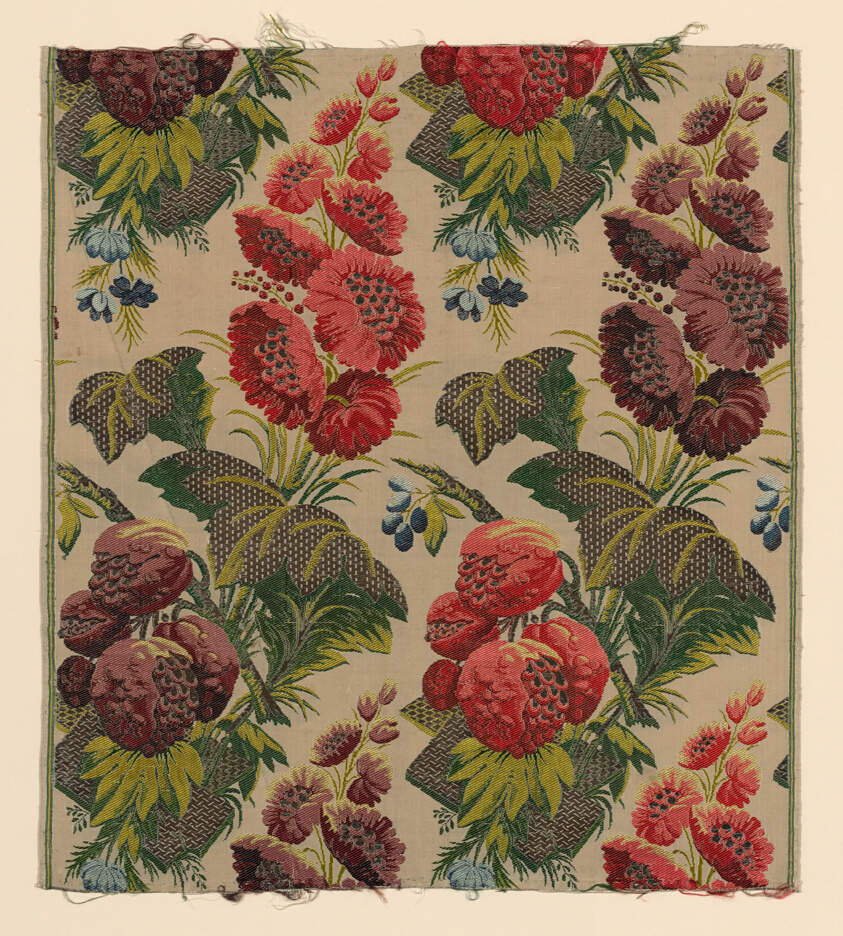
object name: Textile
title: Panel (Furnishing Fabric)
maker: Style of Jean Revel (French, 1684-1751); France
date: c. 1734/35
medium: Silk and silvered-metal-strip-wrapped silk, plain weave with supplementary brocading wefts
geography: France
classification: textile; weaving; furnishing textile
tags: flowers, fruit